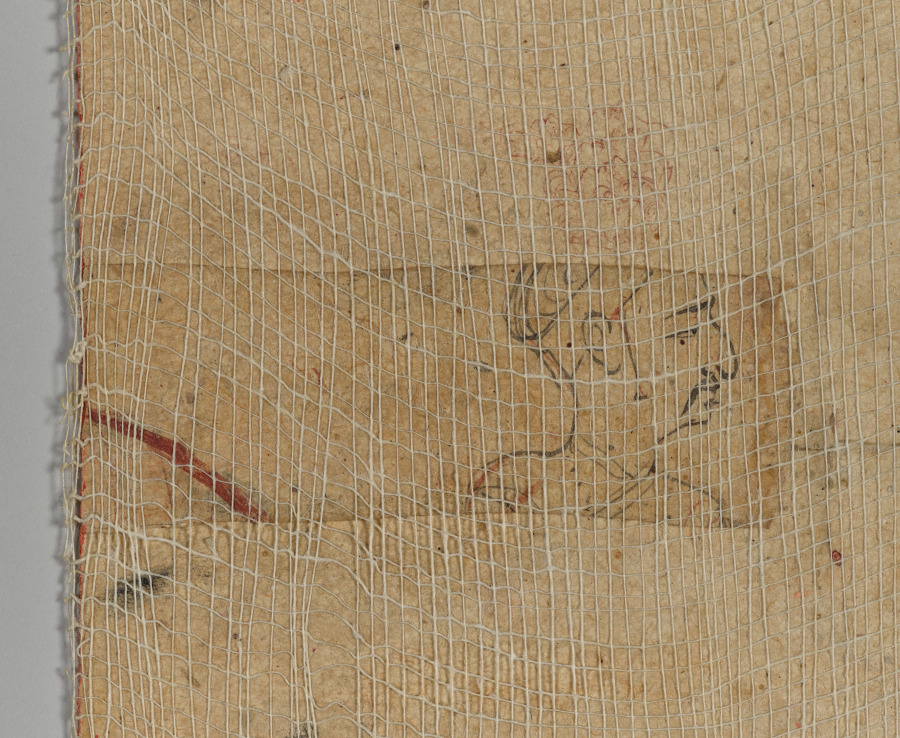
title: Maharana Jagat Singh Attending the Raslila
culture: Northwestern India, Rajasthan, Mewar, Udaipur, 18th century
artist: attributed to Jai Ram (Indian, active 1710–40)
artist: and/or Jiva (Indian, active mid-1700s)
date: 1736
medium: Gum tempera, gold, and silver on paper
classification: Painting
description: To celebrate the New Year festival of Diwali, dancers reenact the life story of the Hindu god Krishna in a palace courtyard by candlelight under the full moon. The king, a vassal of the Mughal emperor, sits with the halo of divine sanction for his rule at the left of the courtyard, smoking from a golden goat-shaped hookah, with his young son and heir at his side. At the top of the composition, a dancer dressed in blue with a peacock-feather crown plays the part of Krishna. In the upper right corner, a canopy painted with swirling storm clouds stands for the rainstorm sent by the jealous king of the gods, who is shown in the middle of the canopy with his consort and mount, the elephant with seven trunks. Guards and grooms in the foreground entertain themselves with music while they wait with the horses of visiting nobles. The formal geometric gardens, playful use of perspective, and individualized portraiture indicate the selective adoption of the styles and sensibilities of the imperial Mughal court in the paintings from this large-format series.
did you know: This painting is one of a set of eight.